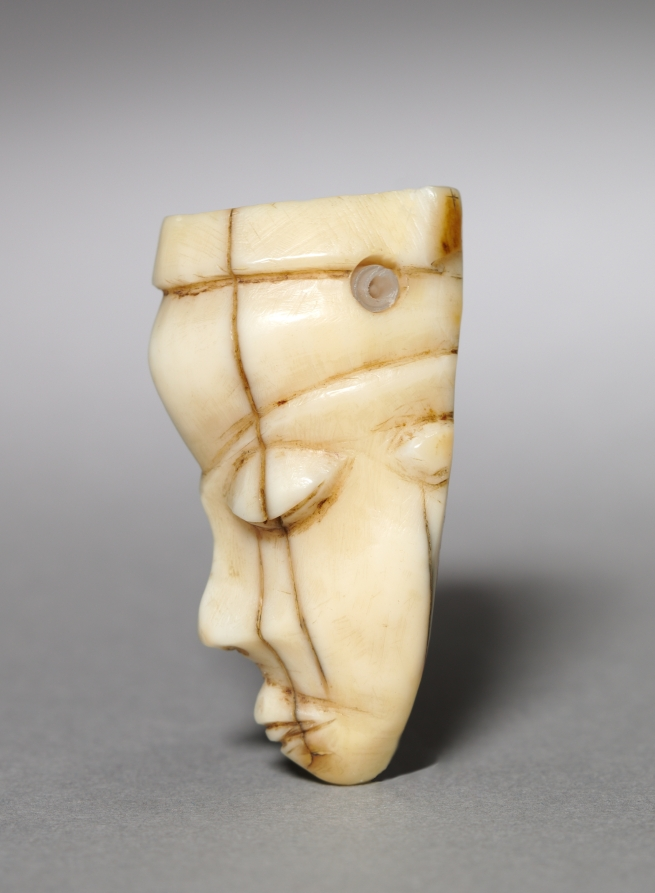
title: Pendant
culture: Central Africa, Democratic Republic of the Congo, Pende, 19th century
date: late 1800s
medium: ivory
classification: Jewelry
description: Pendants like these were worn as symbols of protection.